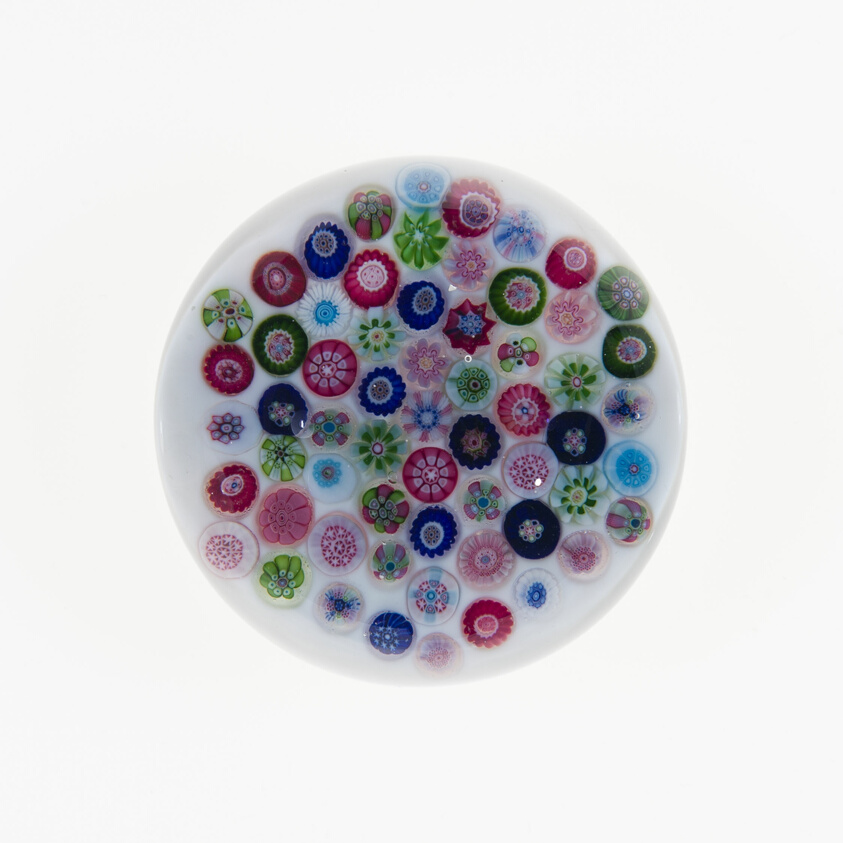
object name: Glass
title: Paperweight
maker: Clichy Glassworks (Cristalleries de Clichy); Clichy, France, 1837-1885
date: c. 1845/60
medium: Glass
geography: France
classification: paperweight; glass